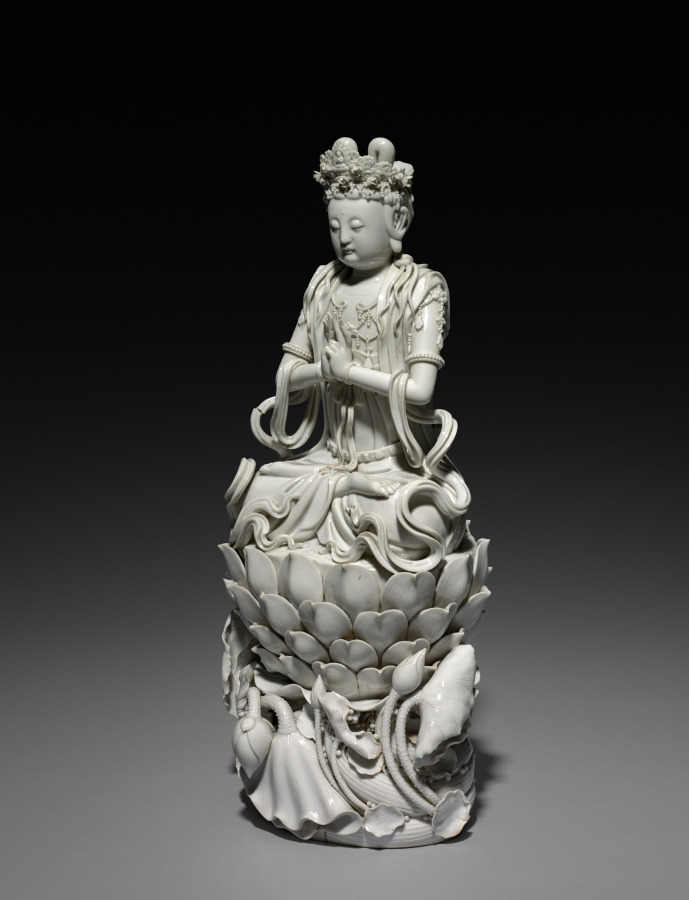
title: Bodhisattva Guanyin of the South Sea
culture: China, Fujian Province, Ming dynasty (1368-1644) - Qing dynasty (1644-1911)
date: 1600s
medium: Porcelain with white glaze, Dehua ware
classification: Ceramic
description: Guanyin, the Buddhist bodhisattva of infinite compassion (Avalokiteshvara in Sanskrit), is the most revered enlightened being in East Asia. The bodhisattva perceives all beings in need of help and reveals himself in many forms. Here, his elaborate lotus pedestal rests on the crest of surging waves, identifying him as Guanyin of the South Seas. The Dehua kilns in Fujian province in southern China produced white porcelain figures for both the domestic and export markets. In China, such a figure may have furnished a house altar or a temple.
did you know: When Marco Polo visited China in the late 1200s, he was so impressed by the Dehua kilns that he included lengthy descriptions of ceramic production in his chronicle of his journey.